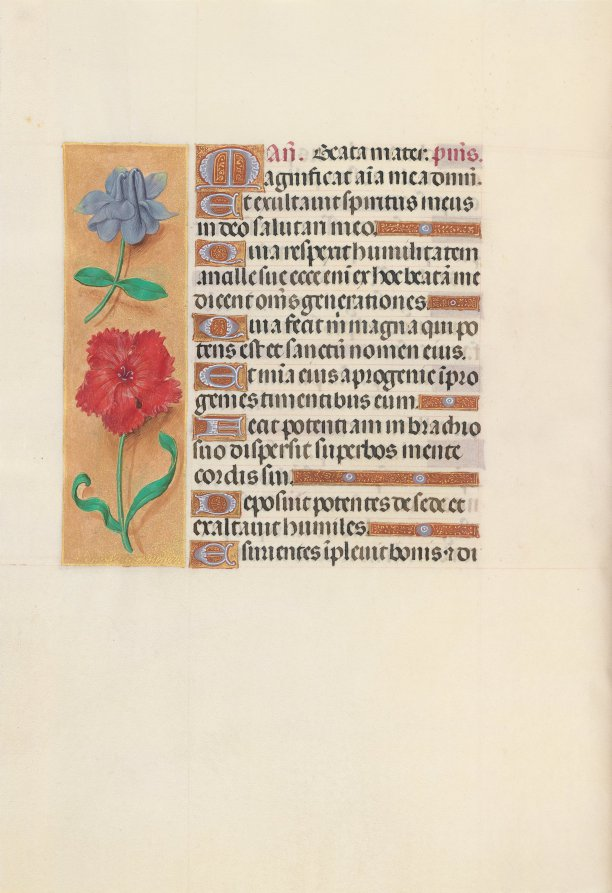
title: Hours of Queen Isabella the Catholic, Queen of Spain: Fol. 151v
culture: Flanders, Ghent and Bruges, late 15th century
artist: Master of the First Prayerbook of Maximillian (Flemish, c. 1444–1519)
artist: and Associates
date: c. 1500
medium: ink, tempera, and gold on vellum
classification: Bound Volume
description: This manuscript was illuminated by a circle of at least five highly organized manuscript painters active in the Flemish cities of Ghent and Bruges. The principal illuminator was Alexander Bening, who painted the majority of the book's miniatures. Manuscripts produced by this circle of artists are renowned for the decoration of their borders, which typically feature a rich variety of realistically-painted flowers, birds, and butterflies. This prayer book, called a book of hours, was intended not for a cleric, but for the private devotions of a lay person-in this case, Isabella the Catholic, Queen of Spain (1451-1504). Isabella's coat of arms embellishes the book's frontispiece. It is unlikely that the book was commissioned by the Queen herself; rather, she probably received it as a diplomatic gift from someone courting her patronage, perhaps Cardinal Francisco Jimenez de Cisneros. A Franciscan friar, Jimenez was dependent upon Isabella for his advancement, first to the post of Queen's confessor in 1492, and then to Archbishop of Toledo in 1495.